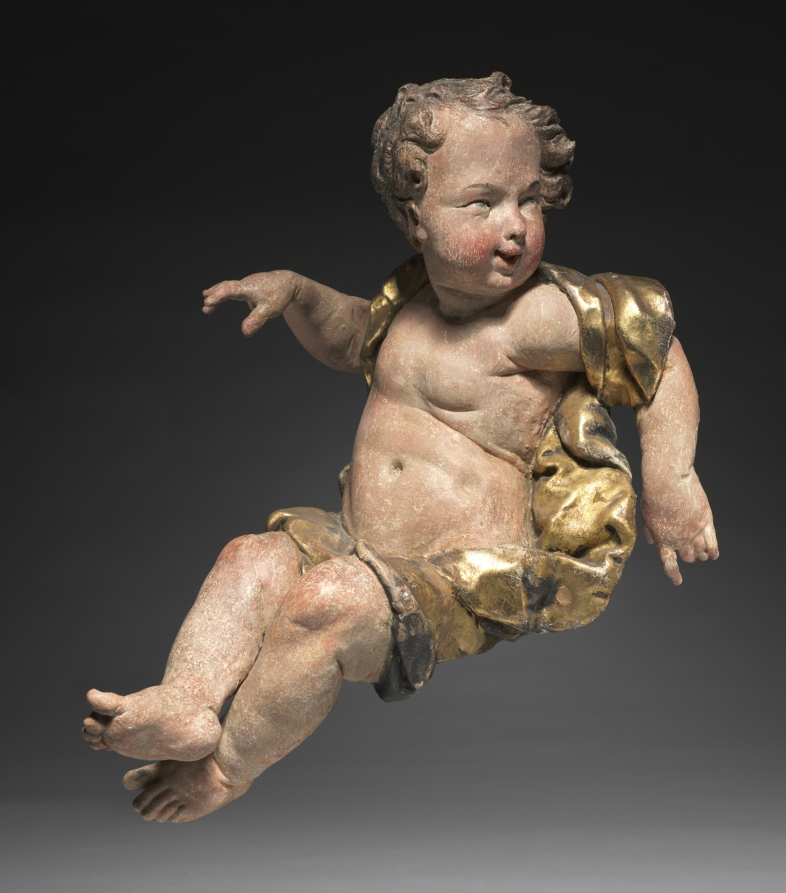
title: Putto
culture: Germany, near Bamberg, 18th century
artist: Ferdinand Tietz (Austrian, 1708–1777)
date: mid-1700s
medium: painted and gilded wood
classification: Sculpture